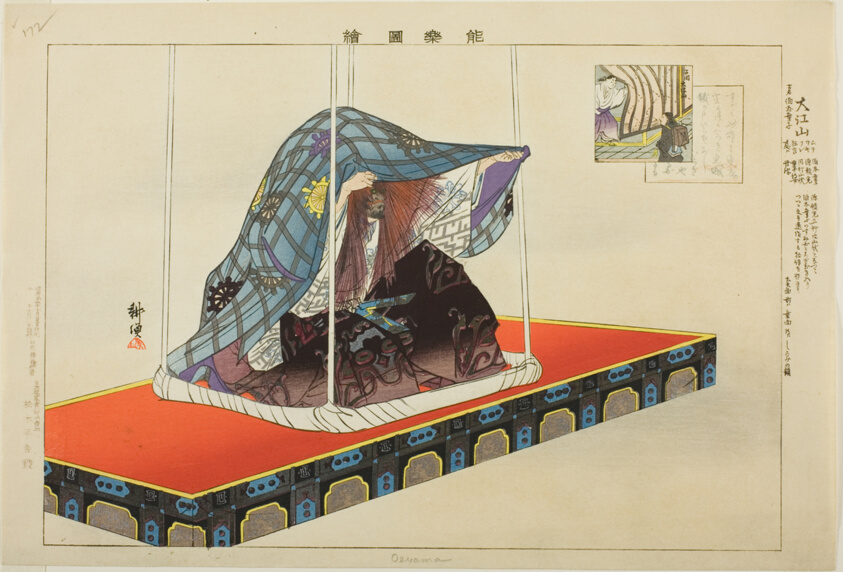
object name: Print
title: Oeyama, from the series "Pictures of No Performances (Nogaku Zue)"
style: Japanese (culture or style)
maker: Tsukioka Kogyo; Japanese, 1869-1927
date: 1898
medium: Color woodblock print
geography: Japan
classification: woodblock print; print; asian art